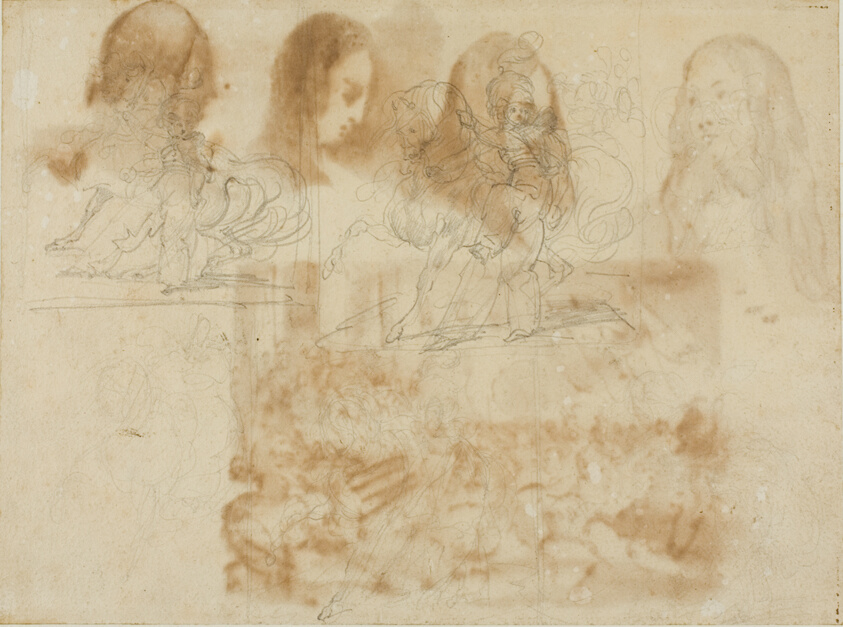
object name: Drawing and Watercolor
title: Six Sketches of a Chasseur Beside His Horse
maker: Jean Louis André Théodore Géricault (French, 1791-1824)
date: 1813/14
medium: Graphite on tan wove paper, perimeter mounted on ivory laid paper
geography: France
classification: drawings (visual works); prints and drawing